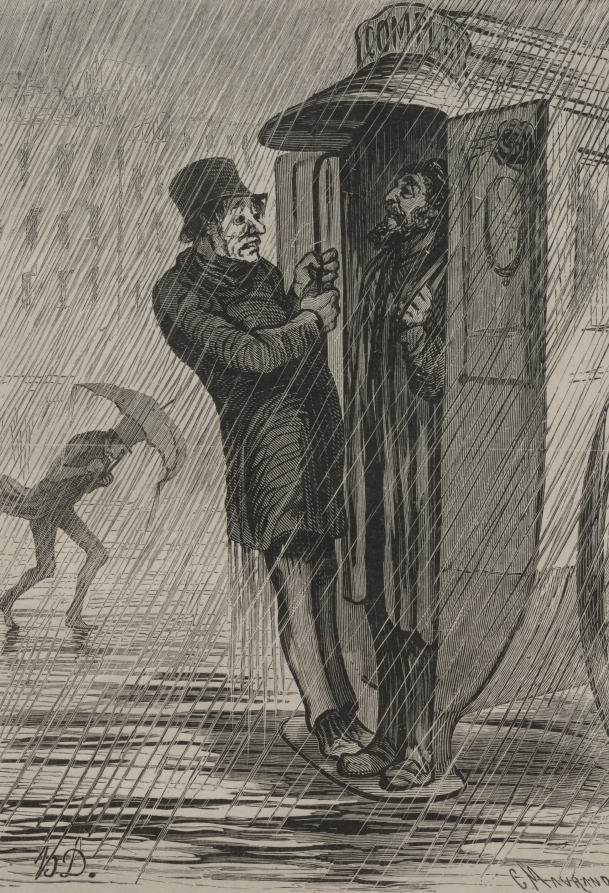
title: The Omnibus: Full!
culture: France, 19th century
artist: Honoré Daumier (French, 1808–1879)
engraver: Charles Maurand (French, 1824–1904)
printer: François Louis Schmied (Swiss, 1873–1941)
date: 1862, printed 1920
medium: wood engraving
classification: Print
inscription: Lower margin, in pencil: 68/75 ; red stamp: FLS